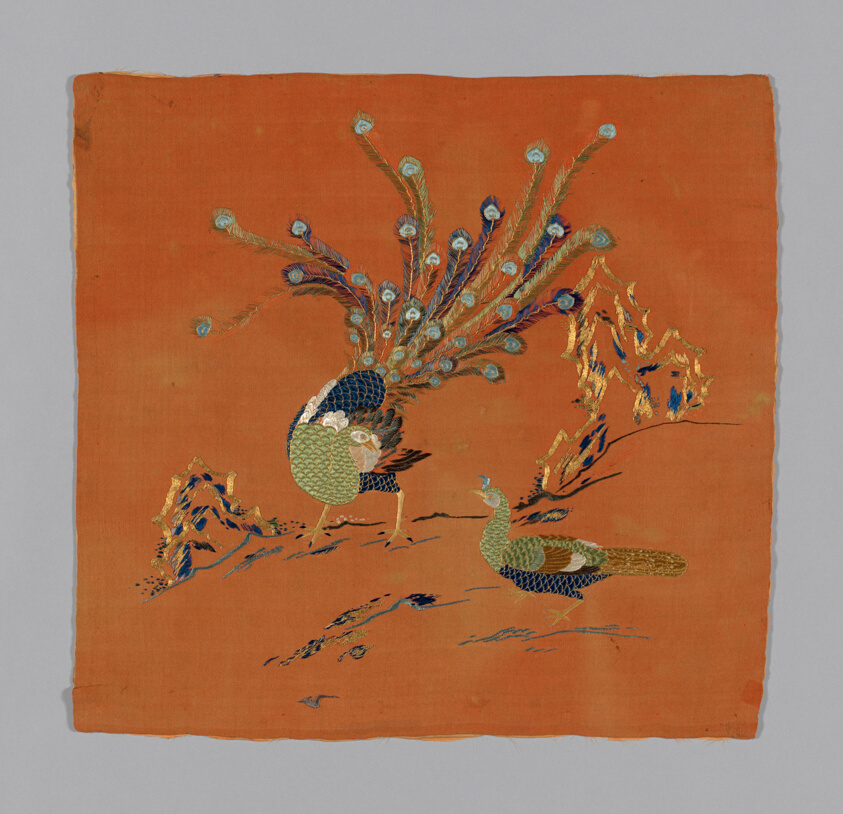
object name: Textile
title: Fukusa (Gift Cover)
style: middle edo, edo (japanese period), Japanism, East Asian, asian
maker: Japan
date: Edo period (1615–1868), 1750/1800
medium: Patterned side: silk, plain weave, with creped wefts (chirimen); embroidered with silk and gold-leaf-over-lacquered-paper -strip wrapped cotton and wrapped silk, in satin, silk padded satin and stem stitches; laidwork and couching; Lined with silk, plain weave; interlined with cotton, plain weave sewn with front and lining matched in size (Tachikire awase)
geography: Japan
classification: textile; needlework (visual works); weaving